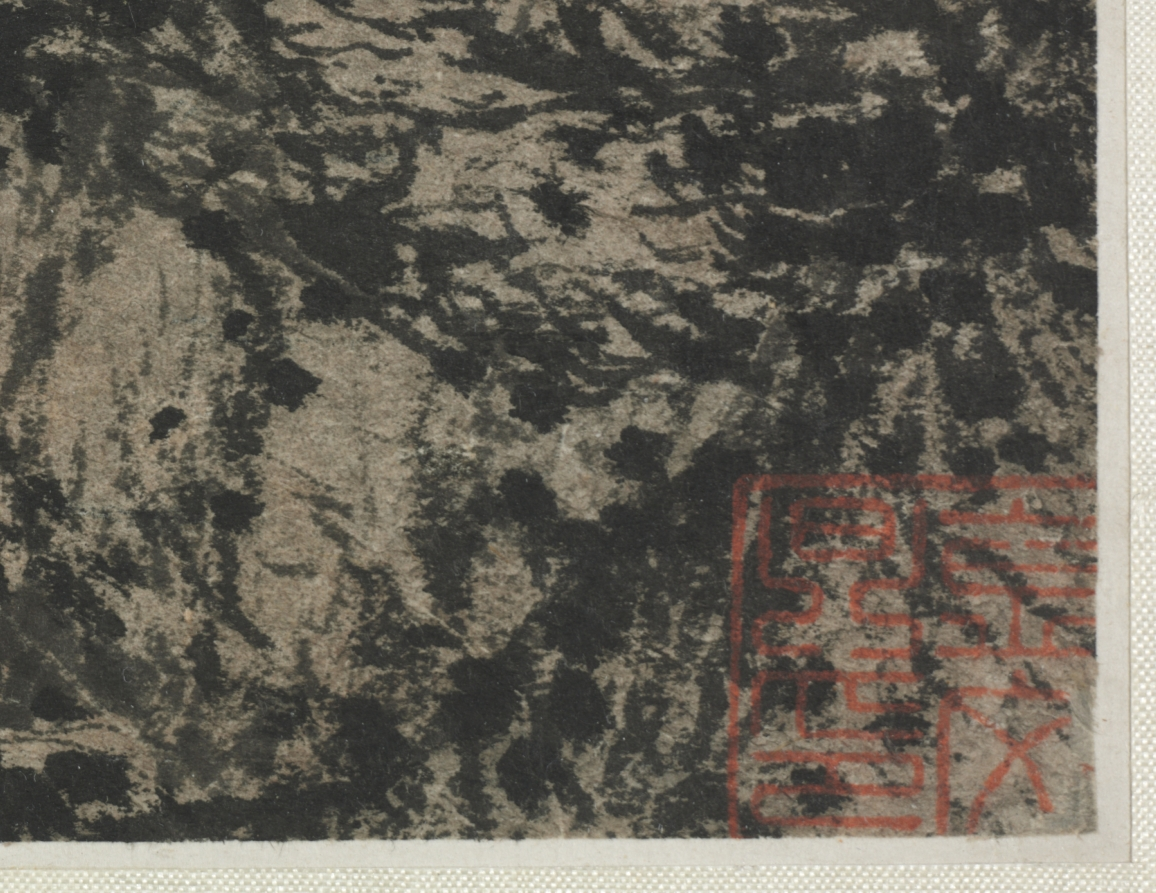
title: Writing Books under the Pine Trees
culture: China, Yuan dynasty (1271-1368)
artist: Wang Meng (Chinese, c. 1308–1385)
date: c. 1308–85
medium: Album leaf; ink and color on paper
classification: Painting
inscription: Artist's inscription, signature, and seal: Many years and months passed by the locked gate/ Behind which the scholar has been immersed in writing his books;/ While the pine trees he had planted/ Have all grown up with old dragon scales./ The Yellow Crane Mountain Woodcutter [Huang-ho-shan-ch'iao] painted this for Chen-su [the hao of Ts'ao Chih-po]. [seal] Wang Meng yin.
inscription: 2 additional seals: 1 of Ts'ao Chih-po (1271–1355); 1 unidentified.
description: Wang Meng, born into a distinguished family in Wuxing (modern Huzhou), Zhejiang province, was the maternal grandson of Zhao Mengfu (1254–1322). Aside from intermittent political commitments under the foreign Mongol and Ming governments, Wang dedicated most of his life to retirement, as conveyed in this painting. By the 1360s, when the Red Turbans began to rebel against the Yuan dynasty leaders, and the Mongols gradually lost control over Jiangnan, Wang Meng withdrew into the mountains north of Hangzhou, calling himself Woodcutter of Yellow Crane Mountain. In the early years of the Ming dynasty, Wang was caught up in a purge and died in prison.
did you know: Wang Meng wrote the inscription at the right in classical seal script and applied his signature and seal on the left side of the composition.